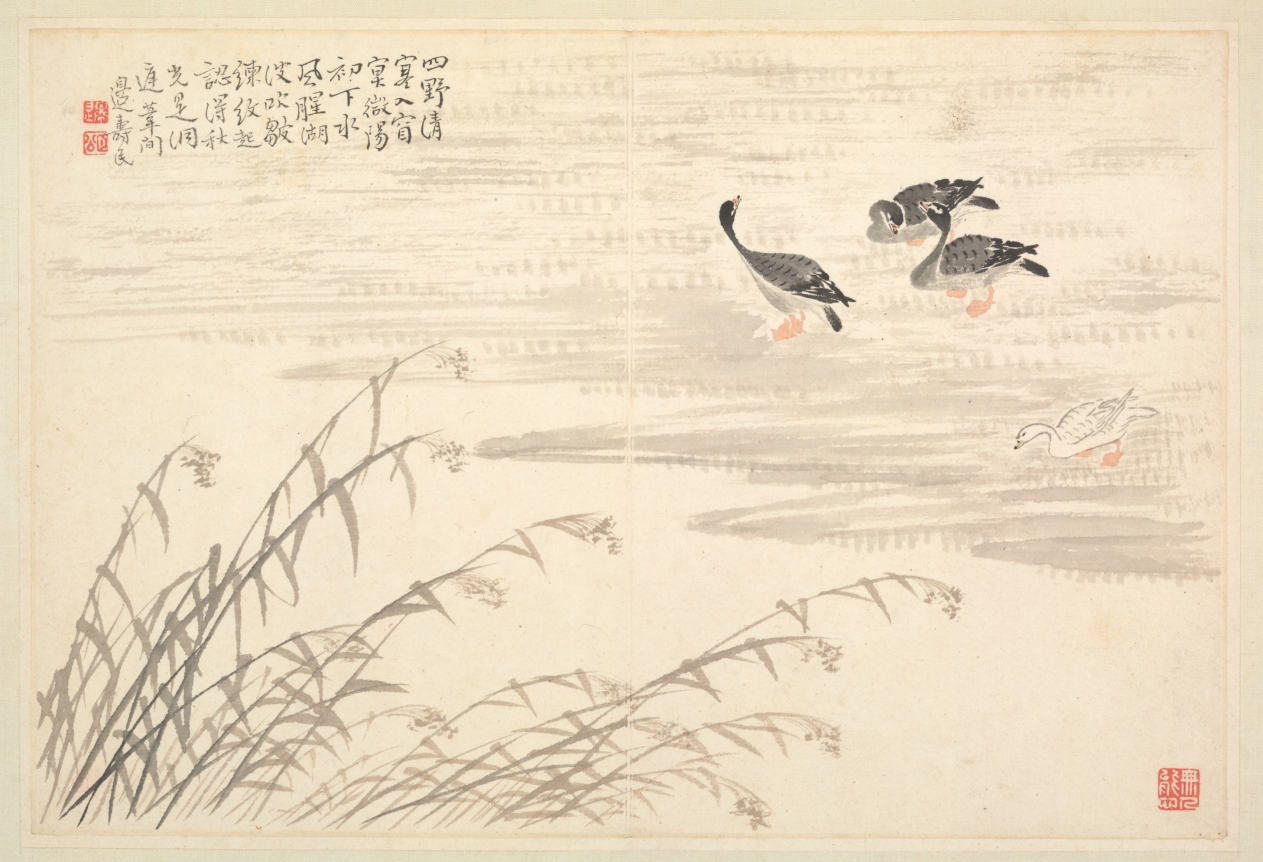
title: Album of Calligraphy and Paintings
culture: China, Qing dynasty (1644-1911)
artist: Bian Shoumin (Chinese, 1684–1752)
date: first half of the 1700s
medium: album leaf; ink and color on paper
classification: Painting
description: The artist Bian Shoumin is known for his depiction of wild geese, water, and reeds. The migrant birds in autumn and winter evoked, in the minds of the Chinese intelligentsia, a time of parting and sorrow.